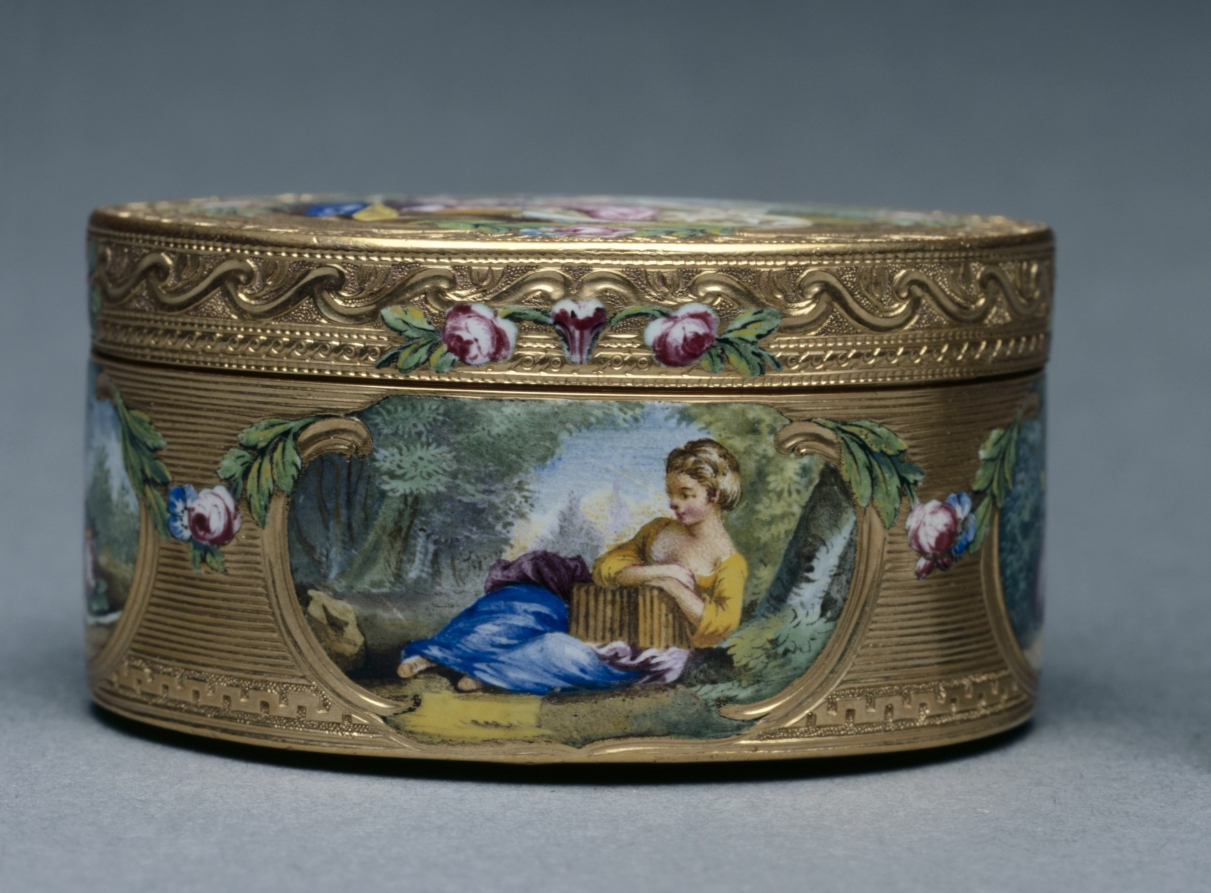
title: Snuff Box (Tabatière)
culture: France, 18th century (style of Louis XV)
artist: Francois Guillaume Tiron (French)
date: 1761–62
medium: gold and enamel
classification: Miscellaneous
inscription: [Maker's mark of Francois-Guillaume Tiron, master goldsmith in 1747, inside cover]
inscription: [Warden's mark, Paris, 1761-1762, inside cover]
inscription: [Charge mark of Eloi Brichard and Etienne Somfoye, Paris, 1756-1762, inside cover]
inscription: [Maker's mark of Francois-Guillaume Tiron, inside bottom]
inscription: [Warden's mark, 1761-1762, inside bottom]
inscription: [Charge mark of Brichard and Somfoye, inside bottom]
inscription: [Maker's mark of FG Tiron, left wall]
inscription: [Charge mark of Brichard and Somfoye, left wall]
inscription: [Warden's mark, Paris, 1761-1762, left wall]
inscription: [Discharge mark of J.J. Prevost, Paris, 1762-1768, bezel at right]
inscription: [Engraved number, maybe retailer's number]: "n. 13676"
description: The pastoral scenes that decorate this box are typical of the style of François Boucher, a celebrated painter of the period whose works were popularly reproduced on decorative arts. Snuff boxes, used practically as containers for powdered tobacco, were often decorated with miniature reproductions of notable works. The miniature on the cover is inspired by Boucher’s The Galant Pastor (Le Pasteur Gallant) (1738) and that on the bottom by The Amusement of the Shepherd Girl (L’Amusement de la Bergère) (1700s).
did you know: François Boucher was a favorite of the French royal court of Louis XV and named first painter of the king in 1765.